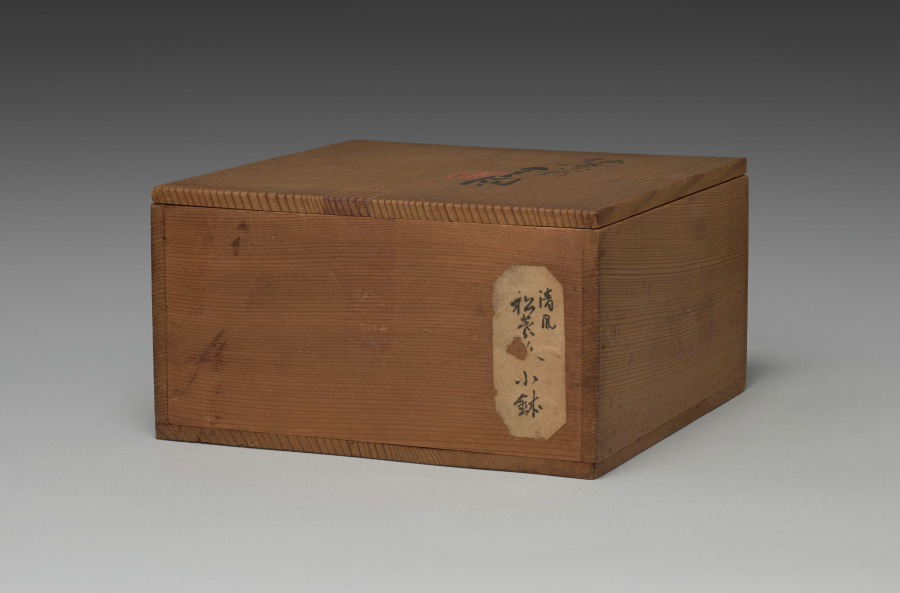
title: Pine-shaped Dish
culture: Japan, Meiji period (1868–1912)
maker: Seifū Yohei III (Japanese, 1851–1914)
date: 1893–1914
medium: Stoneware with underglaze iron oxide and crackled glaze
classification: Ceramic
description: The clever design on this stoneware Awata-style dish makes use of the interior and exterior surfaces to present a close-up view of pine needles on the branch painted in underglaze iron oxide. The branch is shown on the outside of one side of the dish, while the needles fan out across the inside. The entire dish, when seen from above, reveals a shape resembling the mushroom cap–like motif appearing in textile designs and in classical Japanese paintings called Yamato-e to represent pine trees.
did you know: Awata ware, named for the area of Kyoto where it was historically produced, is considered a subset of Kyoto ware. It is characterized by a very light brown body with a transparent crackled glaze.